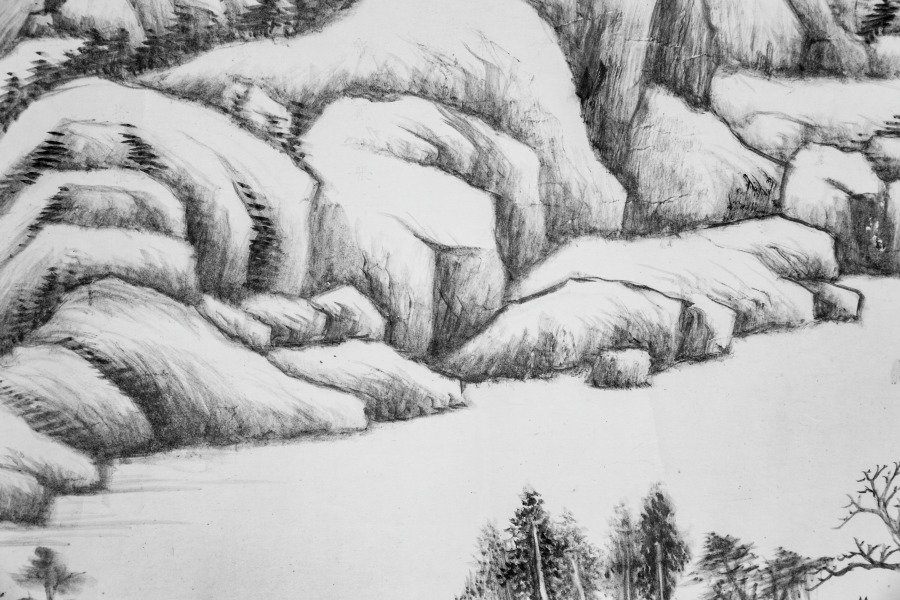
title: River and Mountains on a Clear Autumn Day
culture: China, Ming dynasty (1368–1644)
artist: Dong Qichang (Chinese, 1555–1636)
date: c. 1624–27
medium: Handscroll; ink on Korean paper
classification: Painting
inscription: 黃子久江山秋霽似此，當恨古人不見我也。思翁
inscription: 董文敏每遇高麗鏡面箋，書畫尤為入神。此卷改表紙用之，字跡隱然，兼有朝鮮之印。至於筆法圓秀，真接倪黃。豈文沈所可同日而語也。 康熙庚午中秋後一日，天氣澄爽，重裝初畢，跋於瓶廬。抱瓮翁高士奇。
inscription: Second inscription by Gao Shiqi 高士奇 (1645–1704): On the twenty-third day of the ninth month, the jiaxu year of the Kangxi era [1694], I packed my bags to head north. When my boat passed Wuchang [Suzhou], Mr. Mantang [Song Luo] brought wine to bid me farewell so that we could share our thoughts on our separation in the last few years. I showed him the paintings and calligraphy which I collected and asked his opinions. Since Mr. Mantang does not own any handscrolls by Wenmin [Dong Qichang], I leave this one for him in commemoration of our parting; thus the painting will have a worthy owner and our meeting will become a beautiful story in the future. It is the fourth day after the beginning of winter, with the sky clear and sober. Trees under frost have turned red and yellow, seemingly echoing the brush and ink in the painting. I also ask Mr. Mantang to inscribe a poem to commemorate our meeting so that it will survive forever.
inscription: 1 colophon and 4 seals of Song Luo 宋犖 (1634–1713): Who is the foremost art connoisseur of our dynasty?/ Tangcun [Liang Qingbiao, 1620–1691] is dead, so the title passes to Jiangcun [Gao Shiqi]./ Leaving office, you retired for five years in the Lake region./ Fondling handscrolls and hanging scrolls from morning to evening./ You sent me your collection catalogue Xiao Xia Lu last year;/ It is indeed the true equal of [Zhou Mi's] Yun Yan Guo Yan./ This year you returned to the capital by imperial order;/ Your boat with calligraphy and paintings anchored at the river bank in Suzhou./ When we met each other you did not waste any time for conversation by poured out immediately/ From your "coral net" extraordinary treasures./ You produced incomparable scrolls, with gold-inscribed labels and jade rollers,/ Pouring out from bags and trunks, they were spread in disarray./ Without a word, I rolled and unrolled until my fingers were numbed,/ We sat straight, facing each other quietly, and never felt tired./ For three days we forgot about sleeping and food./ And at times we shouted our joy out loud, forgetting who is host or guest./ Your Dwelling in the Fuchun Mountains and the Yuansheng manuscript/ These peerless works I myself examined with delight./ As an added pleasure to the farewell dinner under the Maple Bridge,/ You allowed me to hold again this handscroll by Dong Qichang--/ The Misty River and Piled Peaks [by Zhao Mengfu] and this Clear Autumn Day are two extraordinary masterpieces./ In showing such life and spirit with "qi yun." the artists were truly "men of heaven."/ The Clear Autumn Day is not even three feet long,/ Painted on tributary Korean paper, it shines like silver./ Every building up and every turn of the mountains imitates nature,/ Every tree and every rock is removed from the commonplace./ From the beginning, the theory of poetry is the theory of painting,/ Like the lotus and the morning sunshine, they complement and refresh each other./ The artist's inscription regrets that "the Old Masters cannot see my scroll."/ Huang Gongwang would have agreed in his grave./ The vermilion of the seals glitter and dazzles the eyes,/ These added accessories are as valuable as jade./ You are very kind to give it to me,/ The feelings expressed in your inscription are so sincere./ Wanting to refuse, but unable, I accept it to respect your wish,/ And taking off my gown and cap I wrapped it with care./ You asked me to write a long poem in commemoration of this beautiful occasion,/ I am too ashamed that my effort in response is so poor and inadequate./ Returning home, I unrolled it under candlelight, trying to write the colophon,/ The light of the waning moon shines at the foot of the mossy wall./ Earnestly humming and brows knit in deep thought, I try to compose;/ The verses are not outstanding, but the facts are real./ With this poem recorded at the end of the scroll, I mail it to you for approval,/ This poem and this painting shall outlast a thousand springs. (Translation by LYSL/HK/WKH)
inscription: 1 colophon and 2 seals of Shao Changheng 邵長蘅 (1637–1704); 2 inscriptions and 14 seals of the Qianlong 乾隆 emperor (r. 1736–95); 1 seal of the Jiaqing 嘉慶 emperor (r. 1796–1820); 3 seals of the Xuantong 宣統 emperor (r. 1908–11); 1 seal unidentified.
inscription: [印] 朝鮮國王之印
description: Dong Qichang had a tremendous impact on the artistic practices and historiography of later generations; his works and writings shaped literati aesthetics. Here, Dong places an abstract landscape composition diagonally across the picture plane, configured to recall earlier masters and simultaneously express his own personal style. Dong’s inscription claims, Huang Gongwang’s Autumn Day, looks like this. I truly regret the master has not seen my work. In fact, Dong Qichang may have had Dong Yuan’s Xiao and Xiang Rivers in mind, a work he owned and considered a key work in Chinese art history.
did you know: The painting has an imprint of a Korean seal that reads "Seal of the king of Joseon."